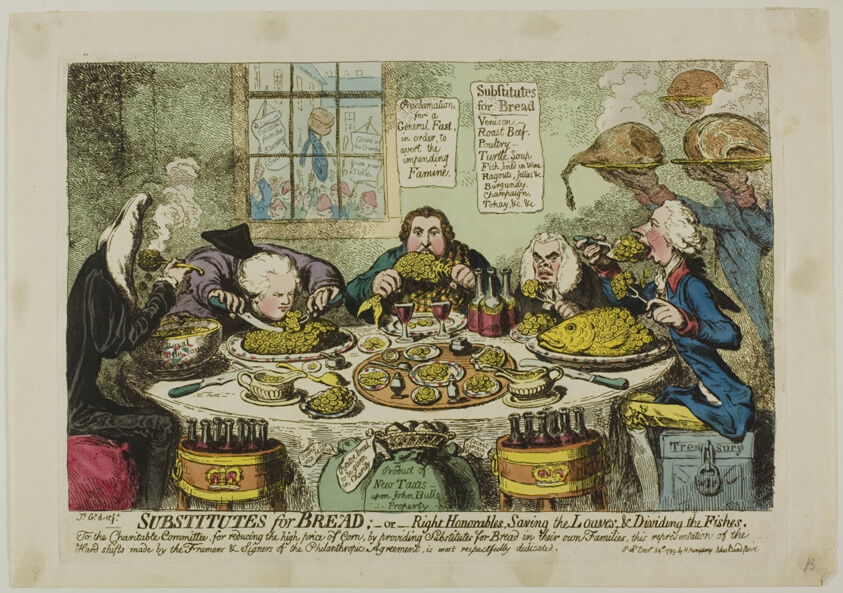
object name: Print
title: Substitutes for Bread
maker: James Gillray (English, 1756-1815); published by Hannah Humphrey (English, c. 1745-1818)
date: published December 24, 1795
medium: Etching in dark brown, with handcoloring, on cream wove paper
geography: England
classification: etching; print; prints and drawing